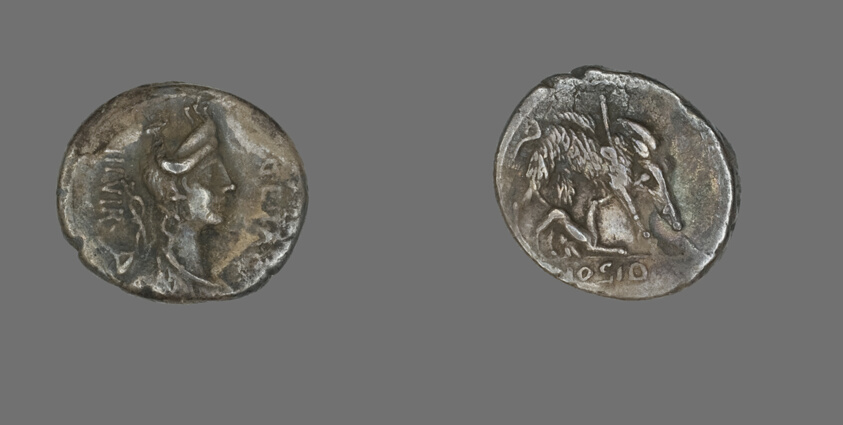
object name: Coin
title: Denarius (Coin) Depicting the Goddess Diana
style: roman (ancient, style or period), ancient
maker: Roman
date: about 68 BCE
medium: Silver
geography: Roman Empire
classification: coin; ancient art